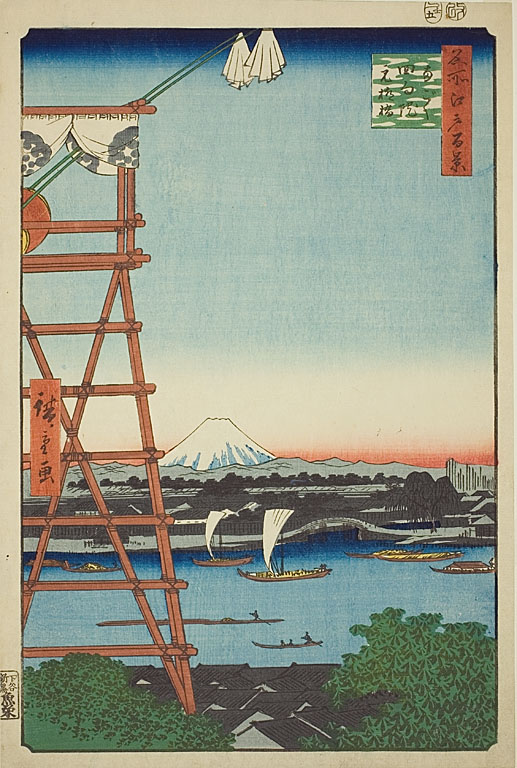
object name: Print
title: Ryogoku Ekoin and Moto-Yanagi Bridge (Ryogoku Ekoin Moto-Yanagibashi), No.5 from the series "One Hundred Famous Views of Edo (Meisho Edo hyakkei)"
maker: Utagawa Hiroshige (Japanese, 1797-1858)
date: 1857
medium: Color woodblock print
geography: Japan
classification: woodblock print; print; asian art